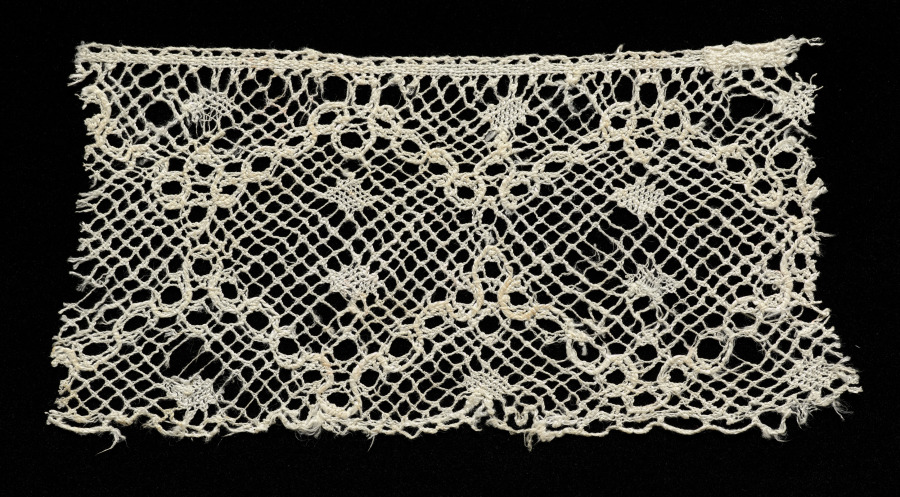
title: Lace Edging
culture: Spain, Huelva(?)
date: 1700s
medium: Bobbin lace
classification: Lace